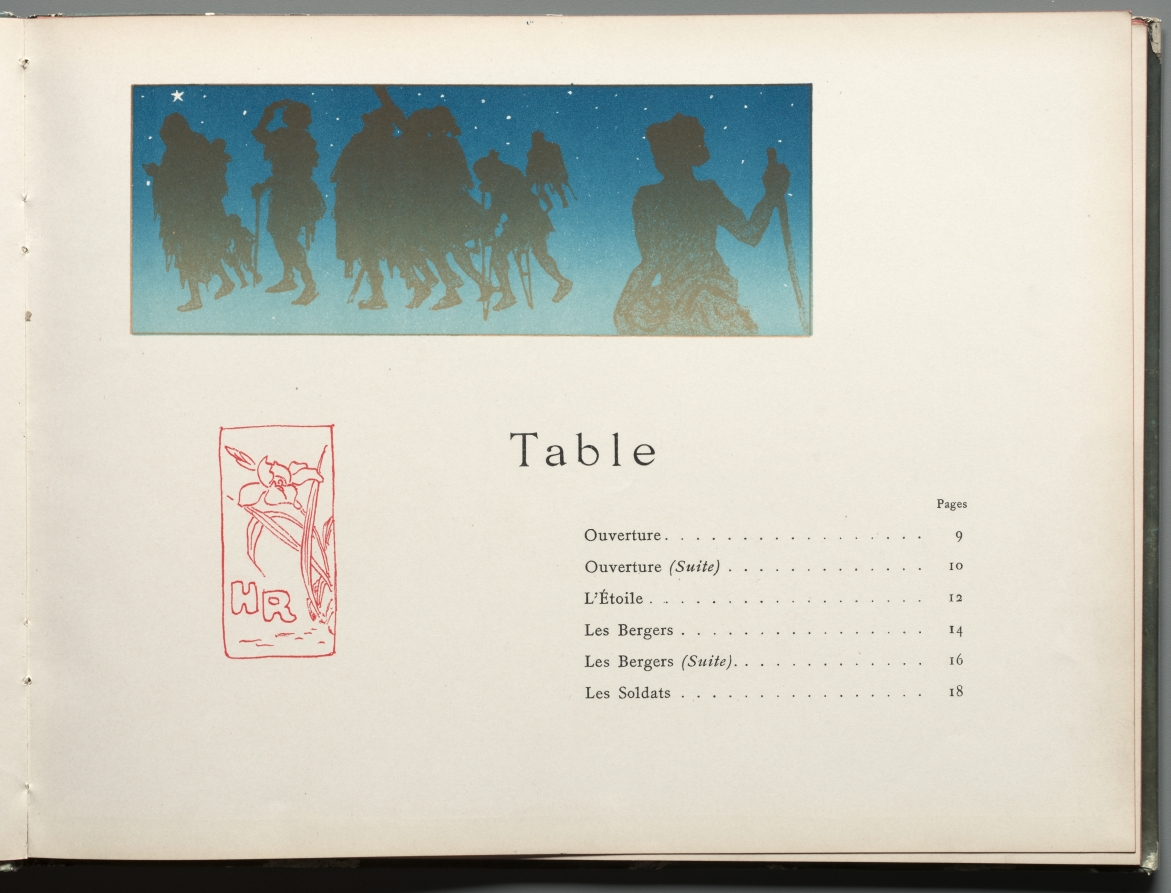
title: The Progress of the Stars: Table of Contents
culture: France, 19th century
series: Bound Volume illustrating the poetry and music of Georges Fragerolle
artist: Henri Rivière (French, 1864–1951)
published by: C. Marpon & Flammarion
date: 1890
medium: 18 color lithographs in a Bound Volume illustrating the poetry and music of Georges Fragerolle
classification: Bound Volume